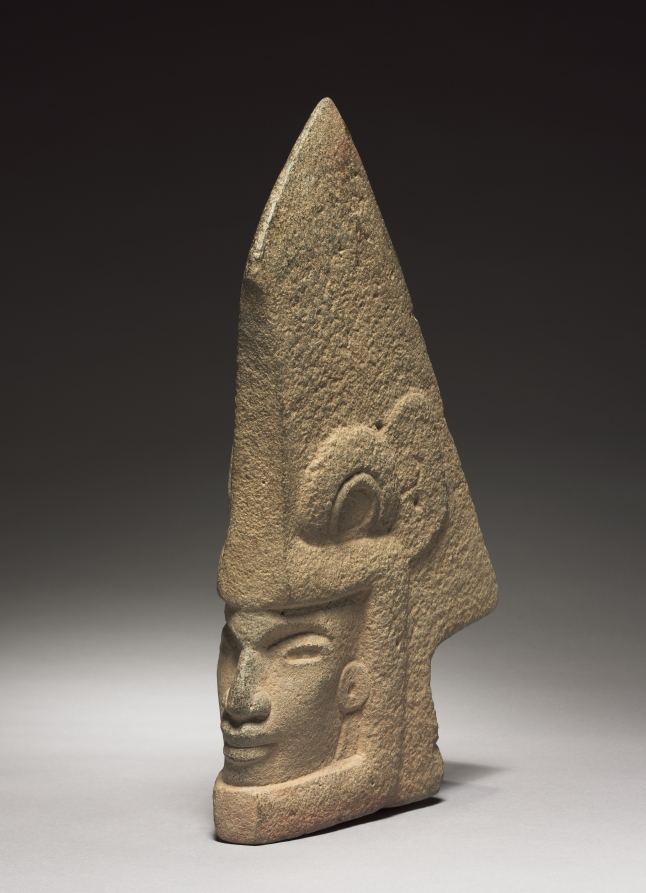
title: Hacha with Human Face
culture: Mexico, Veracruz, San Andres Tuxtla, late Classic period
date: 600–1000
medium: gray volcanic stone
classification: Sculpture